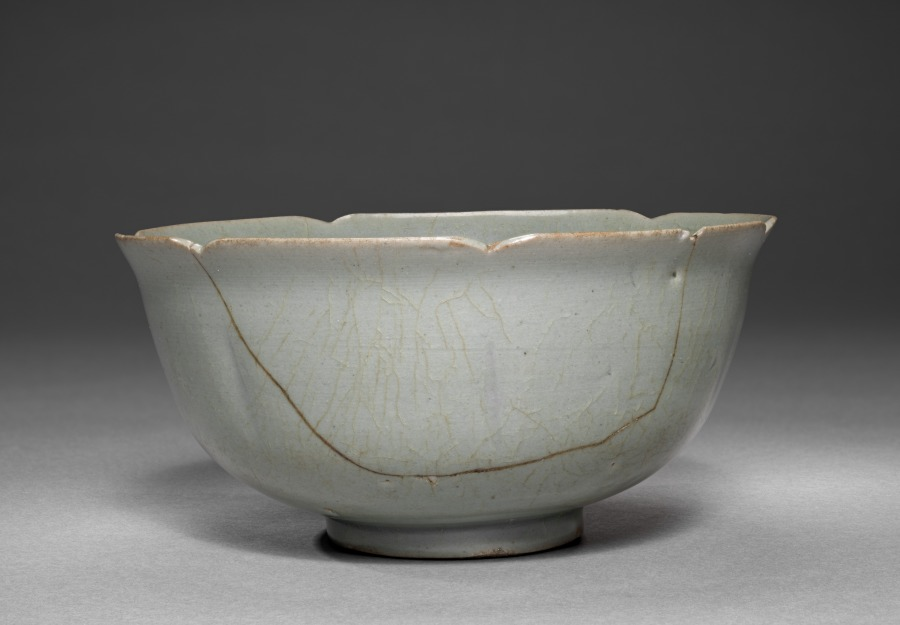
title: Floral-shaped Bowl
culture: Korea, Goryeo dynasty (918–1392)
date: 1100s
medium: Ceramic, glazed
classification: Ceramic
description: Celadons, spoons, seals, and bronze mirrors were the most common burial objects in tombs during the Goryeo period (918–1392). Furnishing tombs with an elaborate assemblage of objects was believed to honor and comfort the newly dead. Generally, Goryeo tombs were left untouched until the late 19th century. During the colonial period (1910–45), however, Japanese archaeologists competitively excavated the tombs located in Kaeseong, the former capital of the Goryeo period. This elegant floral-shaped cup was probably one of those grave goods excavated during the Japanese colonial period.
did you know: Elites of the Goryeo period are known for their love of drinking tea and wine. This type of delicate-looking cup not only made their drinking experience more enjoyable, but also showed their refined taste.